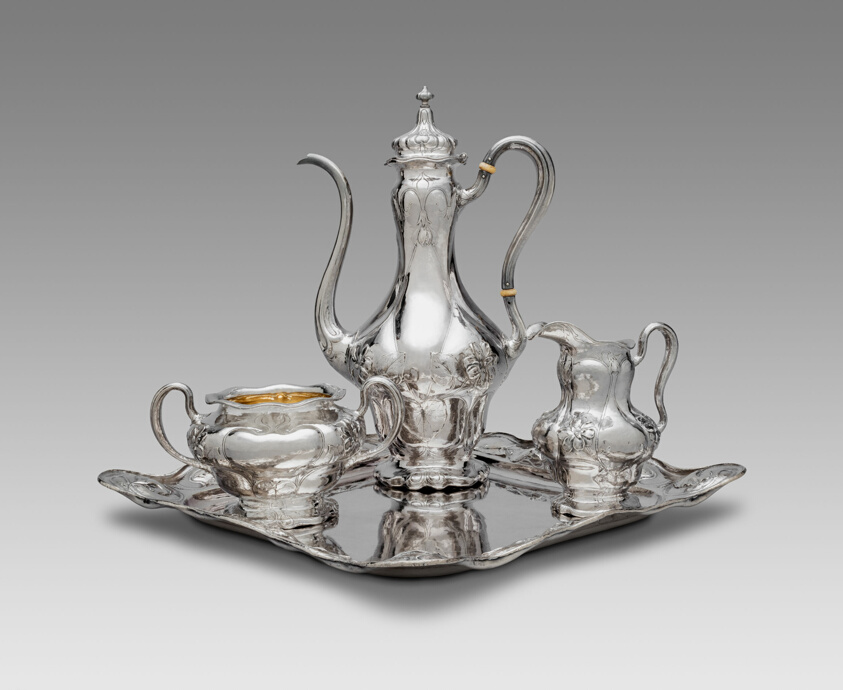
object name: Metalwork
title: Coffee Service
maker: Gorham Manufacturing Company (American, founded 1831); Providence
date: c. 1900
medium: Silver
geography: Providence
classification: coffee service; silver; american decorative arts; american arts; decorative arts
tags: dining, drinking